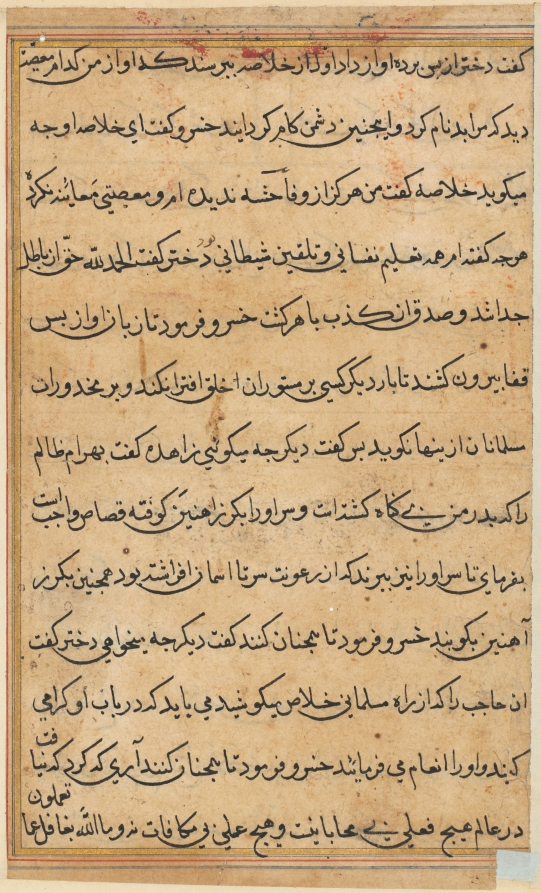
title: Page from Tales of a Parrot (Tuti-nama): text page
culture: Mughal India, court of Akbar (reigned 1556–1605)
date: c. 1560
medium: gum tempera, ink, and gold on paper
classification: Painting